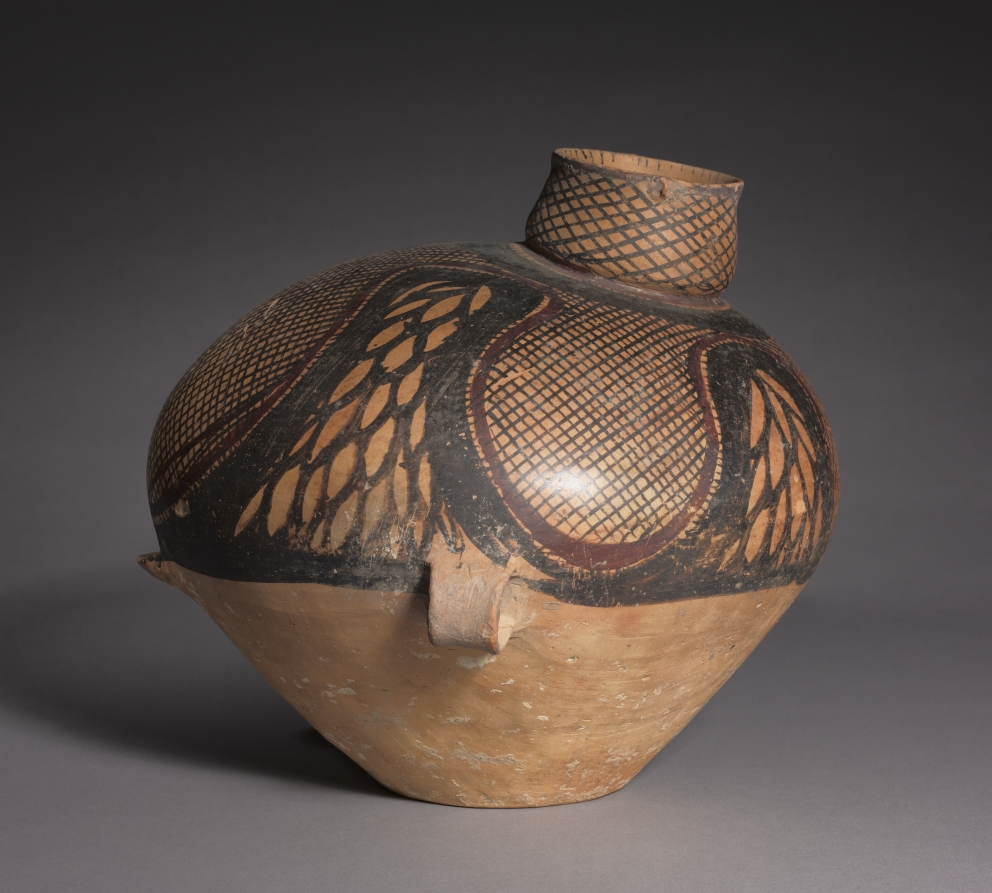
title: Bird-shaped Urn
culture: Northwest China, Neolithic period, Majiayao culture, Banshan phase (2650–2350 BCE)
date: 2650–2350 BCE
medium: earthenware with slip-painted decoration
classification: Ceramic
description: An imaginative shape and abstract curvilinear patterns lend delightful charm to this functional jar. Its fine-grained body has a light reddish color due to the iron content in the clay, achieved by ensuring abundant air in the kiln during the firing. The surfaces were burnished before applying the painted decoration in black and red.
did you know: This abstract vessel may be imagined as a bird with feathers painted on the body.